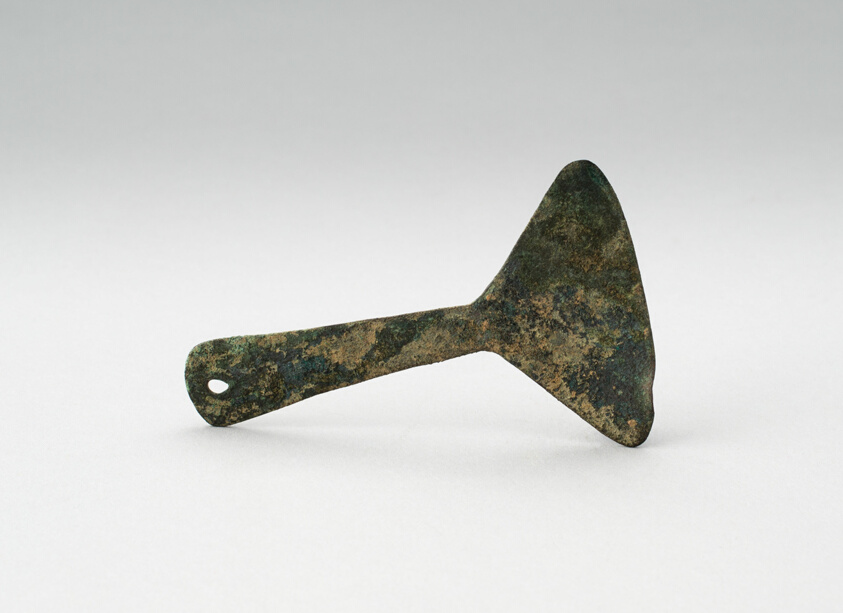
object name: Religious/Ritual Object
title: Ceremonial Knife (Tumi) or Pendant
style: chimú, Arts of the Americas, andean, andes, south american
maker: Possibly Chimú; North coast, Peru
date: Probably 1000–1470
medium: Bronze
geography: Peru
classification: pendant (jewelry); metal; weapon; ritual objects; art of the americas